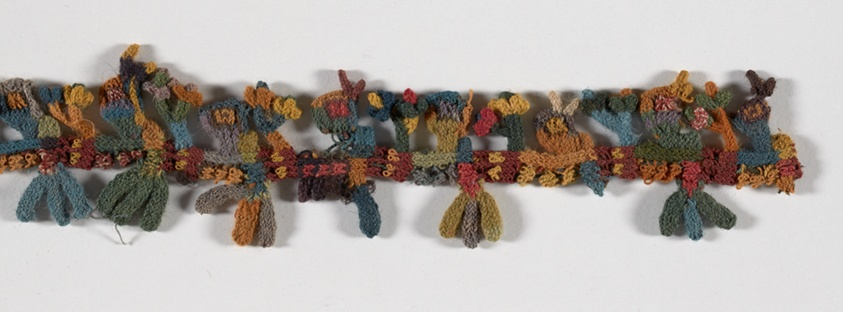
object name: Textile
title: Border Fragment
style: nazca, andean, andes, Pre-Columbian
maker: Nazca; South coast, Peru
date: 100 B.C./A.D. 200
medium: Wool (camelid), tubular cross-knit looping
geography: Peru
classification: textile; weaving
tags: super/natural